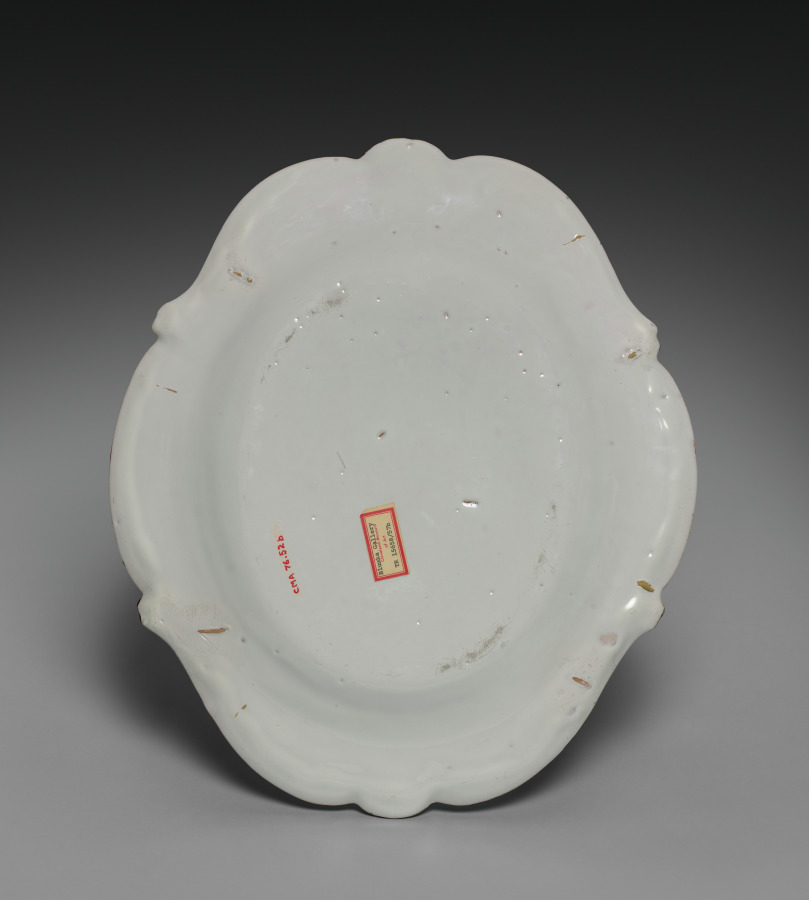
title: Stand for a Tureen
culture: France, Strasbourg, 18th century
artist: Paul Hannong Factory (French)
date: c. 1750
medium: tin-glazed earthenware (faience) with enamel decoration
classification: Ceramic